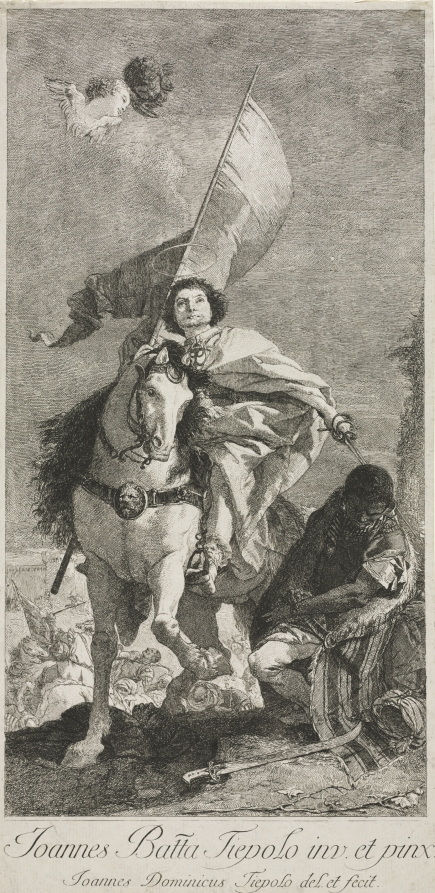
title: St. Jacques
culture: Italy, 18th century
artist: Giovanni Domenico Tiepolo (Italian, 1727–1804)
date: late 1700s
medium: etching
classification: Print